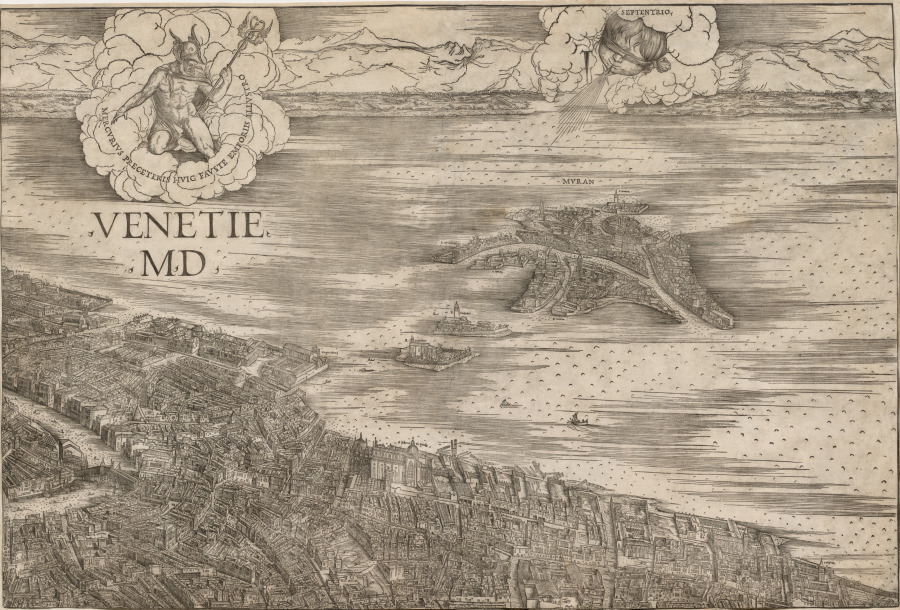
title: View of Venice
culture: Italy, early 16th Century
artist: Jacopo de' Barbari (Italian, c. 1460/70–c. 1516)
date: 1500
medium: woodcut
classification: Print